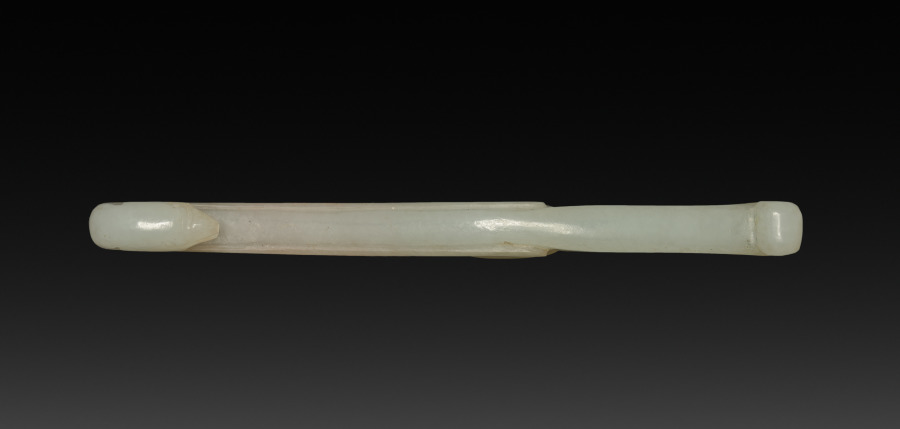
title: Buckle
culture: China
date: 1900s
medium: jade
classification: Jewelry